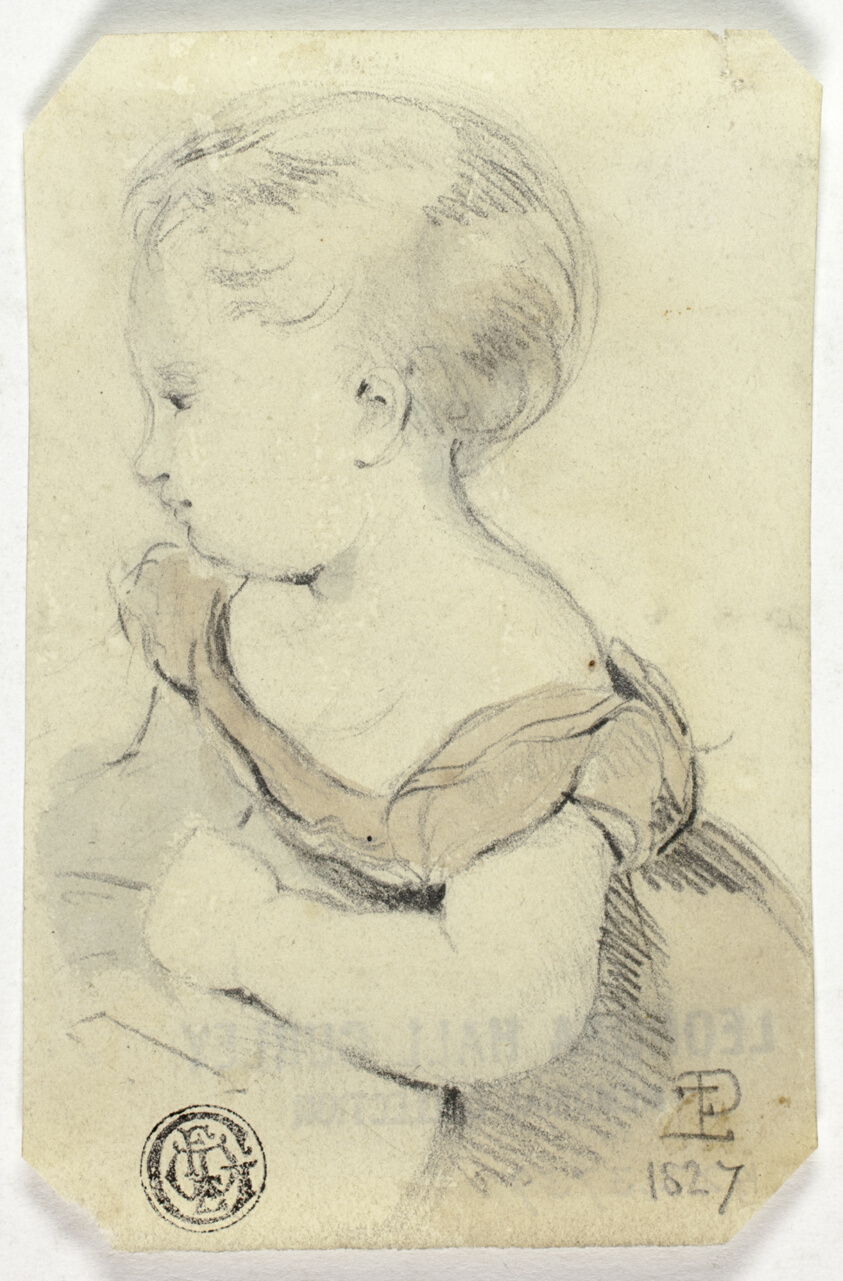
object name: Drawing and Watercolor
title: Little Girl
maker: Edmund Thomas Parris (English, 1793-1873)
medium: Graphite, with brush and pale brown and blue wash, on cream wove paper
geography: England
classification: graphite; drawings (visual works); prints and drawing